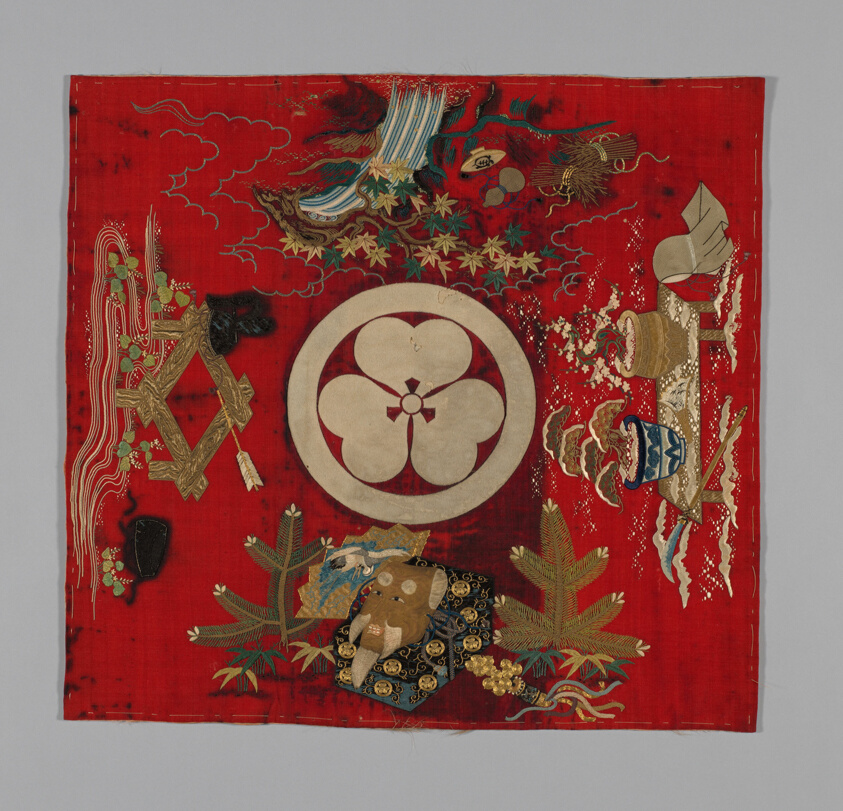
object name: Textile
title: Fukusa (Gift Cover)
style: late edo, edo (japanese period), Japanism, East Asian, asian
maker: Japan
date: Edo period (1615–1868), late 18th century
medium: Mon side: wool, plain weave; appliqué with wool, plain weave; fulled (gorofukuren); embroidered, some areas over paper, with silk, gold-leaf-on-paper-strip wrapped silk, and gold-leaf-over-laquered-paper-strip wrapped cotton and wrapped silk in back, Chinese knot, satin, single satin, surface satin, stem and straight stitches; (probably) bamboo, rolled paper and silk padded satin and stem stitches; laidwork and couching; some embroidered areas painted; lining: silk, 7:1 satin damask weave (donsu); interlined with cotton, plain weave; sewn with front and lining matched in size (Tachikiri awase); silk, running "controlling" stitches along all edges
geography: Japan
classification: textile; needlework (visual works); weaving